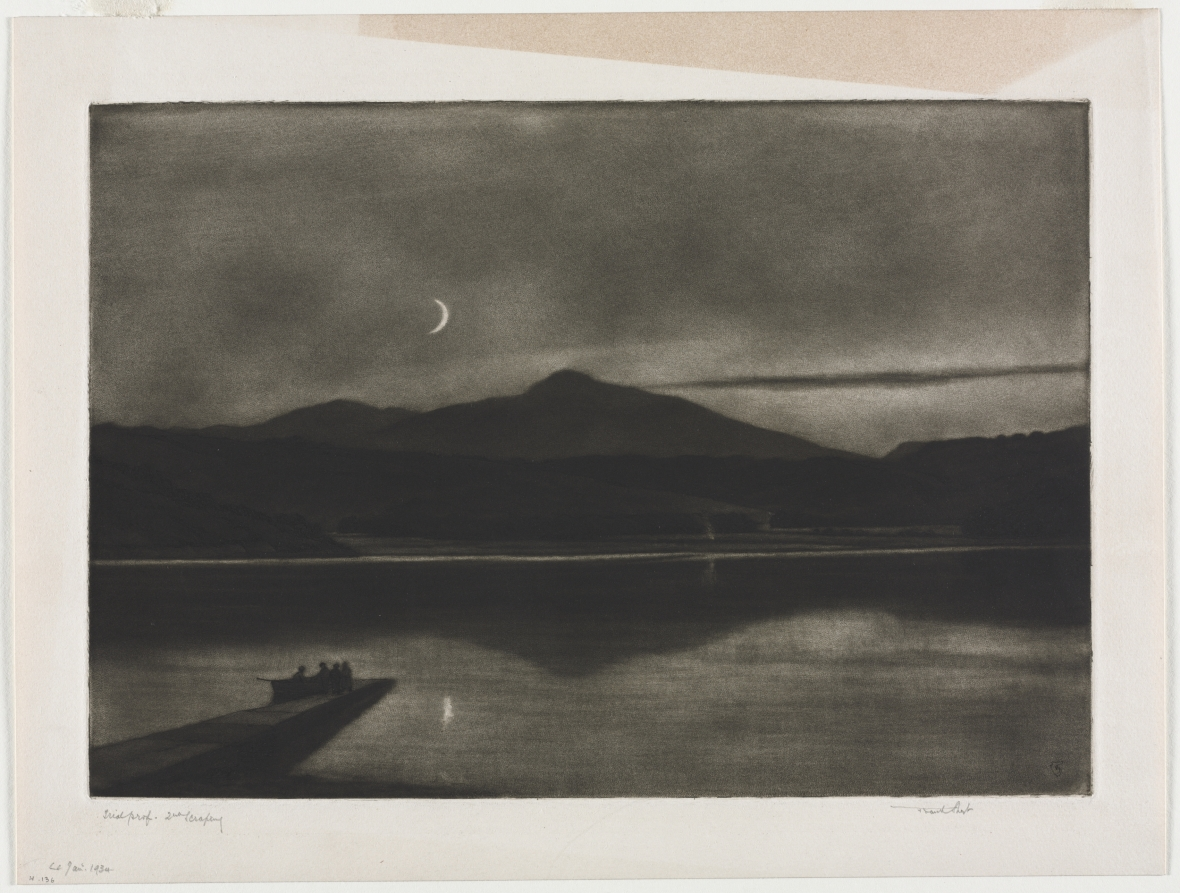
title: Screel Hill and Urr Water from Kypford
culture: England, 20th century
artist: Frank Short (British, 1857–1945)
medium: etching and mezzotint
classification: Print